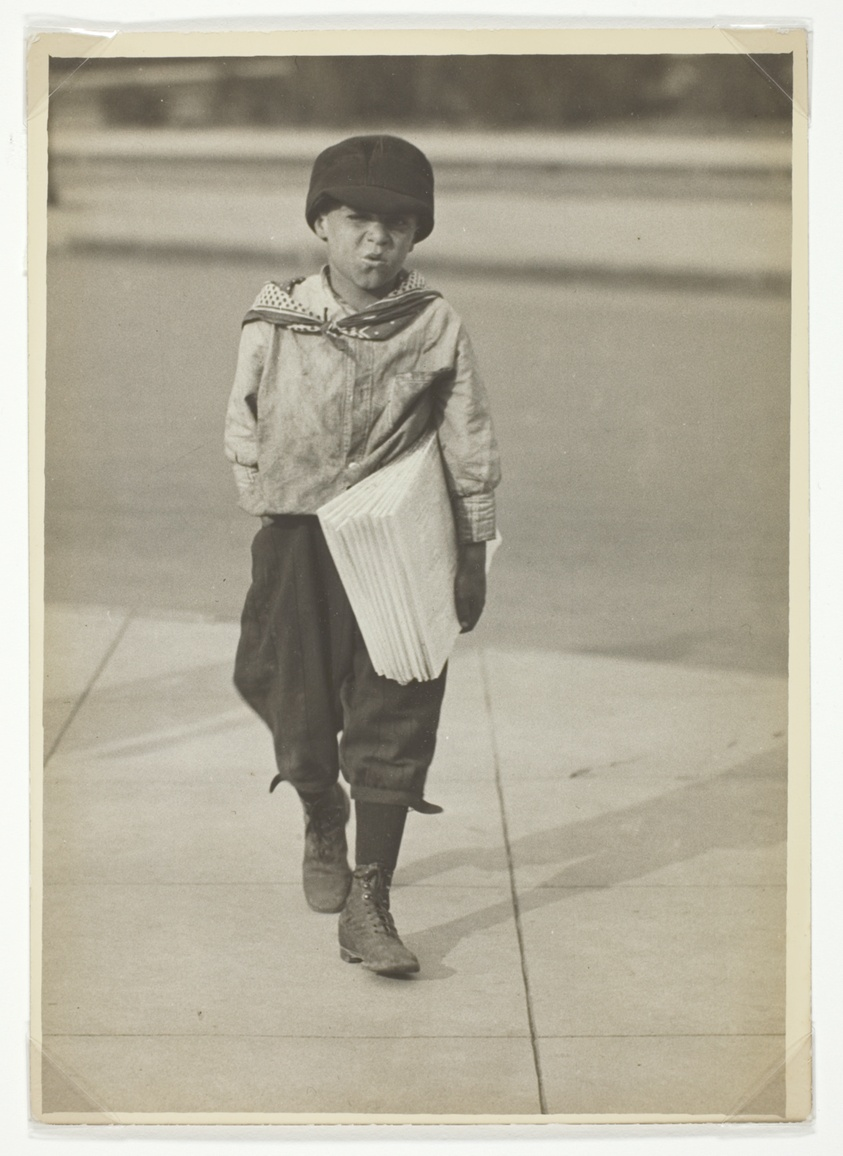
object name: Photograph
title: Dannie Mercurio, 150 Schottes Alley, Washington D.C.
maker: Lewis Wickes Hine (American, 1874–1940)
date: April 1912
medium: Gelatin silver print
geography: United States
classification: gelatin silver (developing-out-paper) pr; photographic process; photography; photograph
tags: Collected by Hugh Edwards, children, documentary